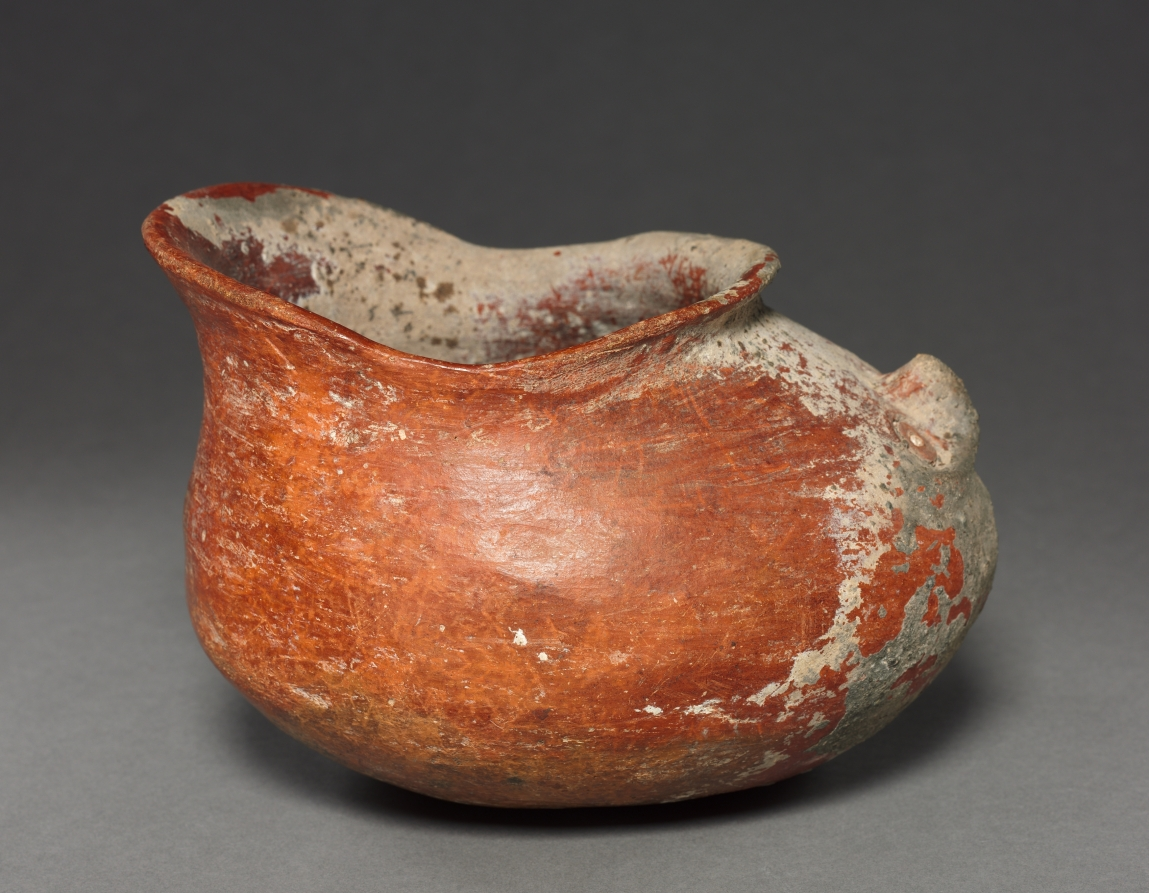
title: Head Effigy Bowl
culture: Mexico, Region of Tilantongo, District of Tlaxiaco, Nayarit style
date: 100 BCE–300 CE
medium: pottery with burnished red slip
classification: Ceramic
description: After about 200 BC, West Mexican chieftains gained in authority, their new status reflected in shaft tombs that shelter not only their remains but also lavish offerings, including sculptural ceramics. Many of the ceramics may refer to the crucial activities of a chief’s life, such as marriage, feasting, and war. The meaning of this unusual bowl—a head whose gaping mouth serves as the aperture—is unknown.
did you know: Diego Rivera and Rufino Tamayo were avid collectors of ancient Nayarit art.